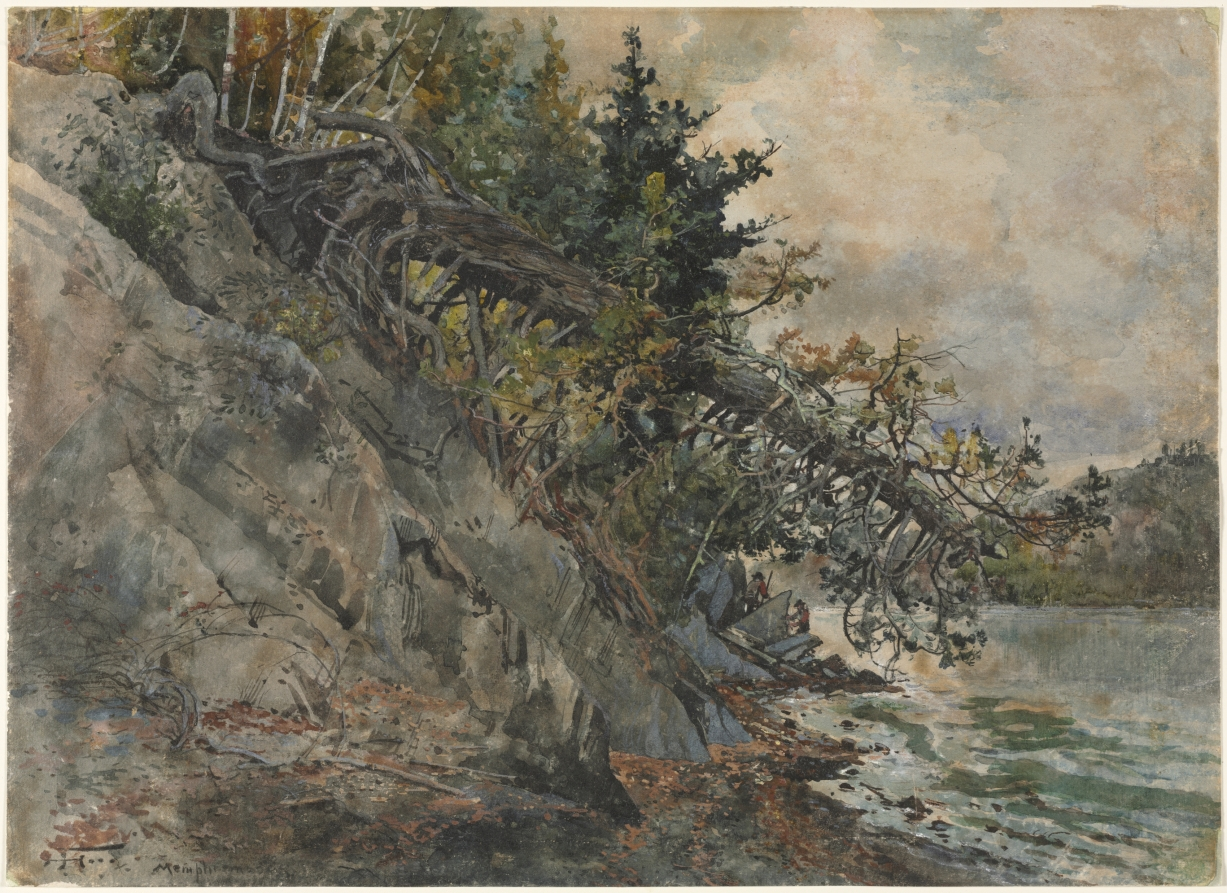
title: Lake Memphremagog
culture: America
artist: Harry Fenn (American, 1838/45–1911)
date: c. 1880s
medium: watercolor and gouache over graphite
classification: Drawing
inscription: signed, lower left, in black ink: [artist monogram] ... Memphremagog ; VERSO OF SECONDARY SUPPORT, lower left, in graphite: WCA - 3518 ; [see departmental card for record of old inscriptions]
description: This watercolor reveals the technical virtuosity of Harry Fenn, an illustrator famed for his rich handling of detail and his bizarre sense of fantasy. As a young man, Fenn sketched widely in the United States for a lavish two-volume set titled Picturesque America. After 1881, he devoted himself to watercolor painting and illustrating. This watercolor represents Lake Memphremagog, which extends across the border of America and Canada, from North Vermont into South Quebec.